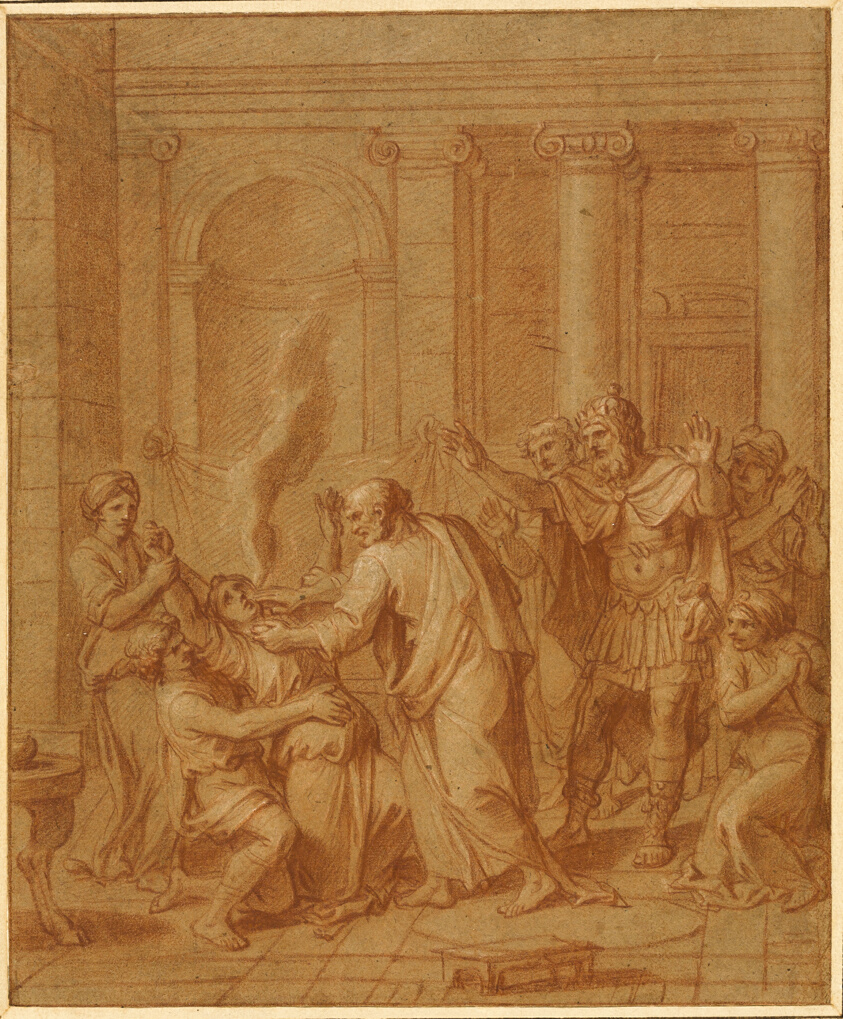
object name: Drawing and Watercolor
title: Death of Sapphira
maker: François Verdier (French, 1651-1730)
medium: Red chalk, heightened with white chalk, on brown laid paper, laid down on cream laid paper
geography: France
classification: chalk; drawings (visual works); prints and drawing